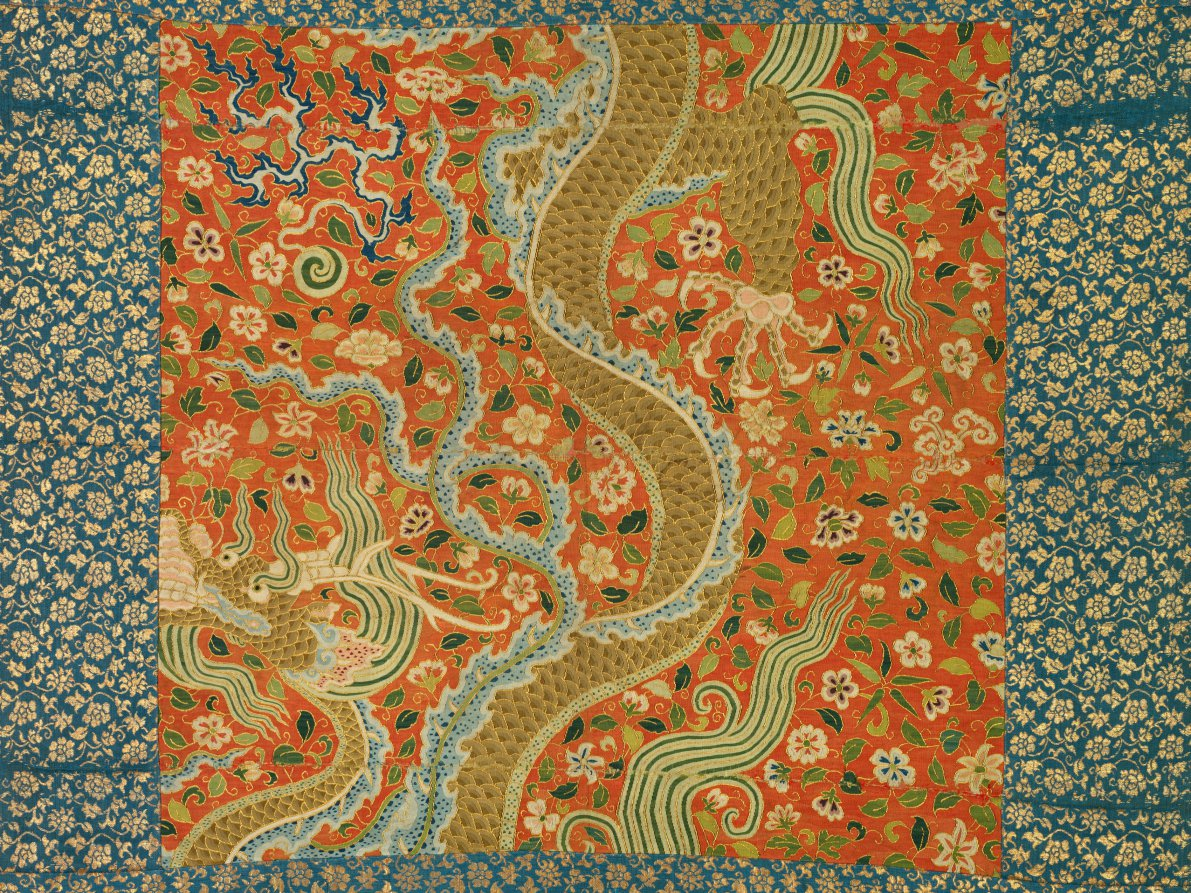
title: Canopy with Dragon among Flowers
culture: China, Center: Southern Song dynasty (1127-1270) Border: Ming dynasty (1368-1644)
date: 1100s/1400s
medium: Center: silk, gold, tapestry weave (kesi). Border: silk, gold, lampas weave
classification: Textile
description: The tapestry sewn into the center of this canopy depicts dragons among flowers, a classic design in Chinese art. Its weavers paid attention to fine details, such as the color gradation of the dragon’s scales, or subtle color changes in the flower petals and leaves. The selection of colored silk threads is soft in tone but rich in variety. All these stylistic characteristics indicate that this tapestry was woven in an imperial Southern Song workshop in the capital of Hangzhou, a center of textile production in the Jiangnan region.